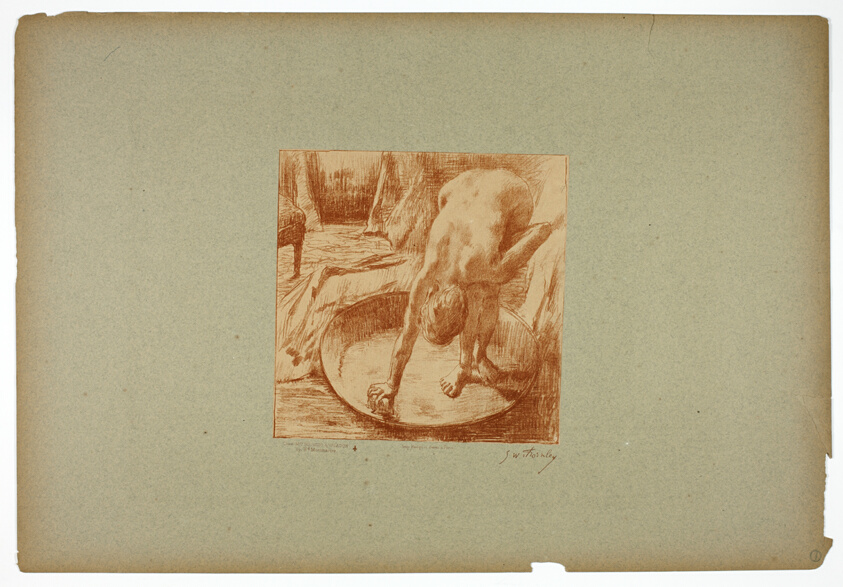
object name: Print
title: The Bath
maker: Georges-William Thornley (French, 1857-1935); after Edgar Degas (French, 1834-1917); printed by Atelier Becquet (French, 19th century); published by Boussod, Valadon, & Company (French, 18th-19th century)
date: 1889–90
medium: Lithograph in sienna on paper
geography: France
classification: lithograph; print; prints and drawing